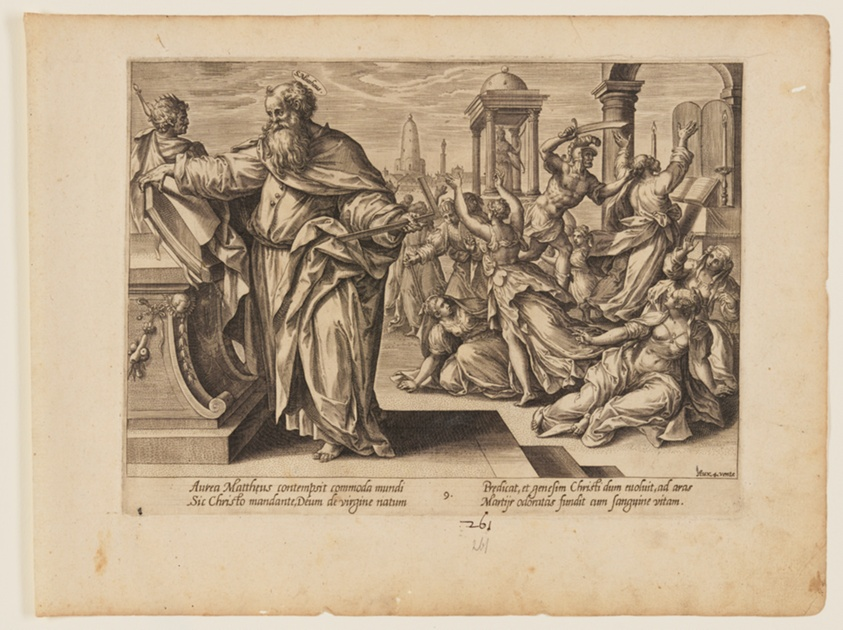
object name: Print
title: he Martyrdom of St Matthew, from The Martyrdom of Christ and the Apostles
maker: Hendrick Goltzius (Dutch, 1558–1617); after Maarten de Vos (Flemish, 1532–1603); published Hieronymus Cock (Netherlandish, c. 1510–1570)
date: c. 1578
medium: Engraving on ivory laid paper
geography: Netherlands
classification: engraving; paper; print; prints and drawing